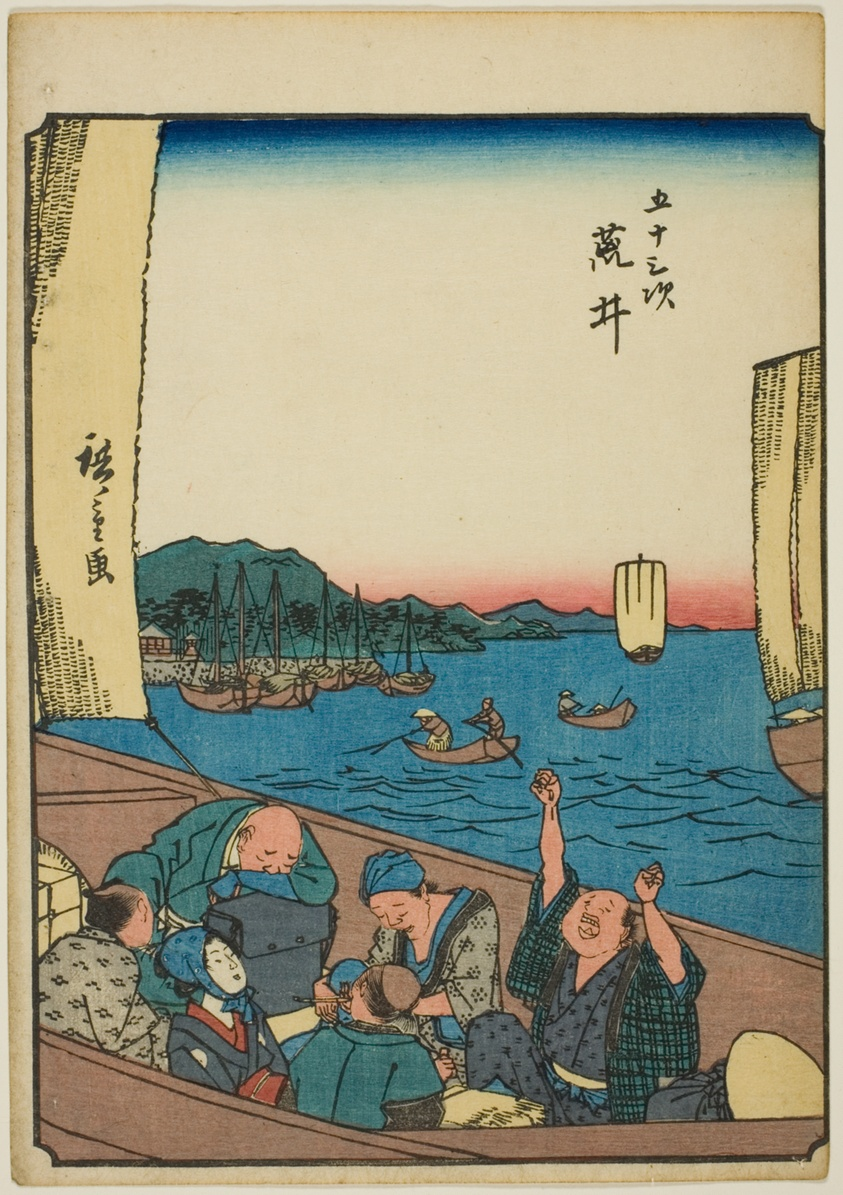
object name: Print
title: Arai, from the series "Fifty-three Stations [of the Tokaido] (Gojusan tsugi)," also known as the Figure Tokaido (Jinbutsu Tokaido)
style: Japanese (culture or style)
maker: Utagawa Hiroshige 歌川 広重; Japanese, 1797-1858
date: 1852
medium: Color woodblock print; chuban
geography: Japan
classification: woodblock print; print